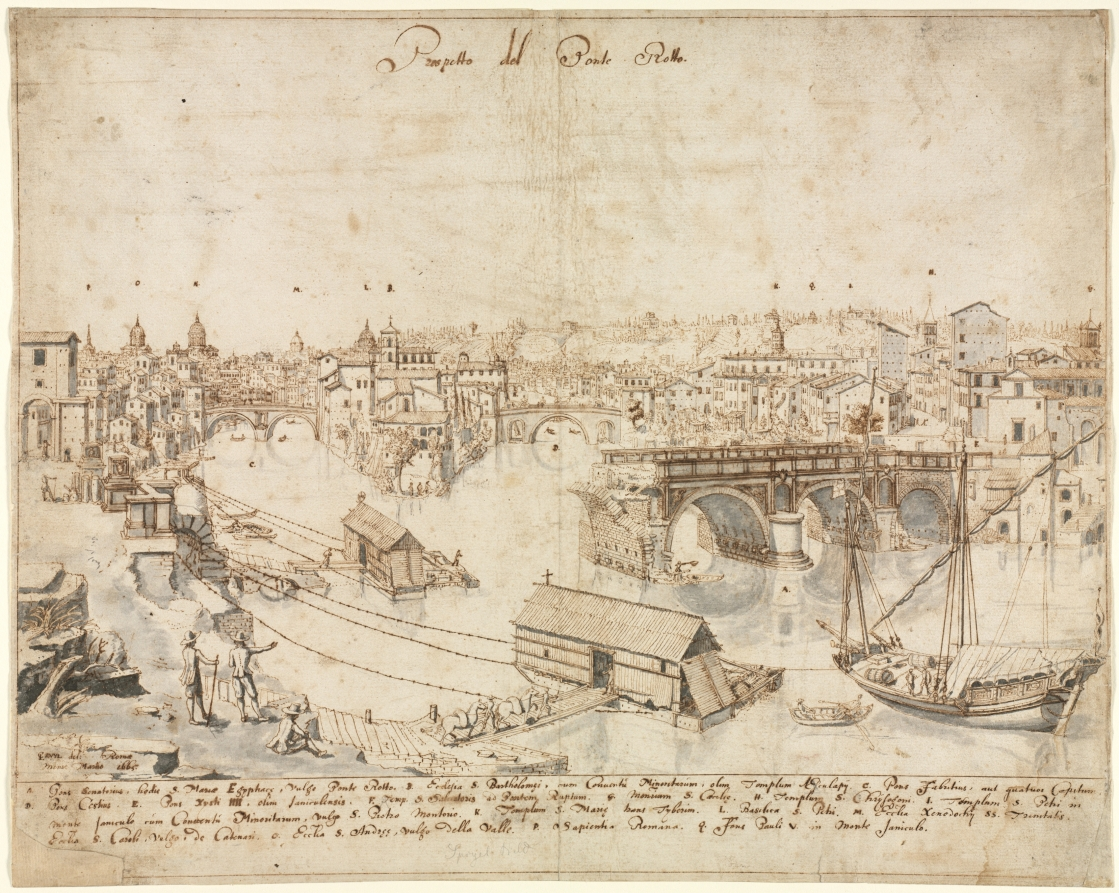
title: Eighteen Views of Rome: The Ponte Rotto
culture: Flanders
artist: Lievin Cruyl (Flemish, c. 1640-c. 1720)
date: 1665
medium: pen and brown ink and brush and gray wash over graphite; framing lines in brown ink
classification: Drawing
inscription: signed, lower left, in brown ink: [artist's monogram: LC] RVYL del: Romæ / mense Martio 1665. ; by artist, upper center, in brown ink: Prospetto del Ponte Rotto. ; by artist, throughout composition, in brown ink: [the letters A-Q] ; by artist, across bottom, in brown ink: A. Pons Senatorius, hodie S. Mariæ Egyptiacae, vulgo Ponte Rotto. B. Ecclesia S. Bartholomaei, cum Conventû Minoritarum, olim Templum Æsculapij. C. Pons Fabritius, aut quatuor Capitum. / D. Pons Cestius. E. Pons Xysti IIII, olim Janiculunsis. F. Temp. S. Salvatoris ad Pontem Rupium. G. Monrium S. Cæciliæ. H. Templum S. Chrijsogoni. I. Templum S. Petri in / Monte Janiculo cum Conventú Minoritarum, vulgo S. Pietro Montorio. K. Templum S. Mariæ trans Tyberim. L. Basilica S. Petri. M. Ecclia Xenodochij SS. Trinitatis. / [N.] Ecclia S. Caroli, vulgo, de Catenari. O. Ecclia S. Andreæ, vulgo della Valle. P. Sapientia Romana. Q. Fons Pauli V. in Monte Janiculo. ; lower center, in graphite: Spiegel Bild ; VERSO, upper left, in brown ink: [illegible] [partially masked] ; ON STRIPS OF PAPER MOUNTED TO VERSO, lower center, in graphite: A20986 ; lower right, in graphite: E. 15